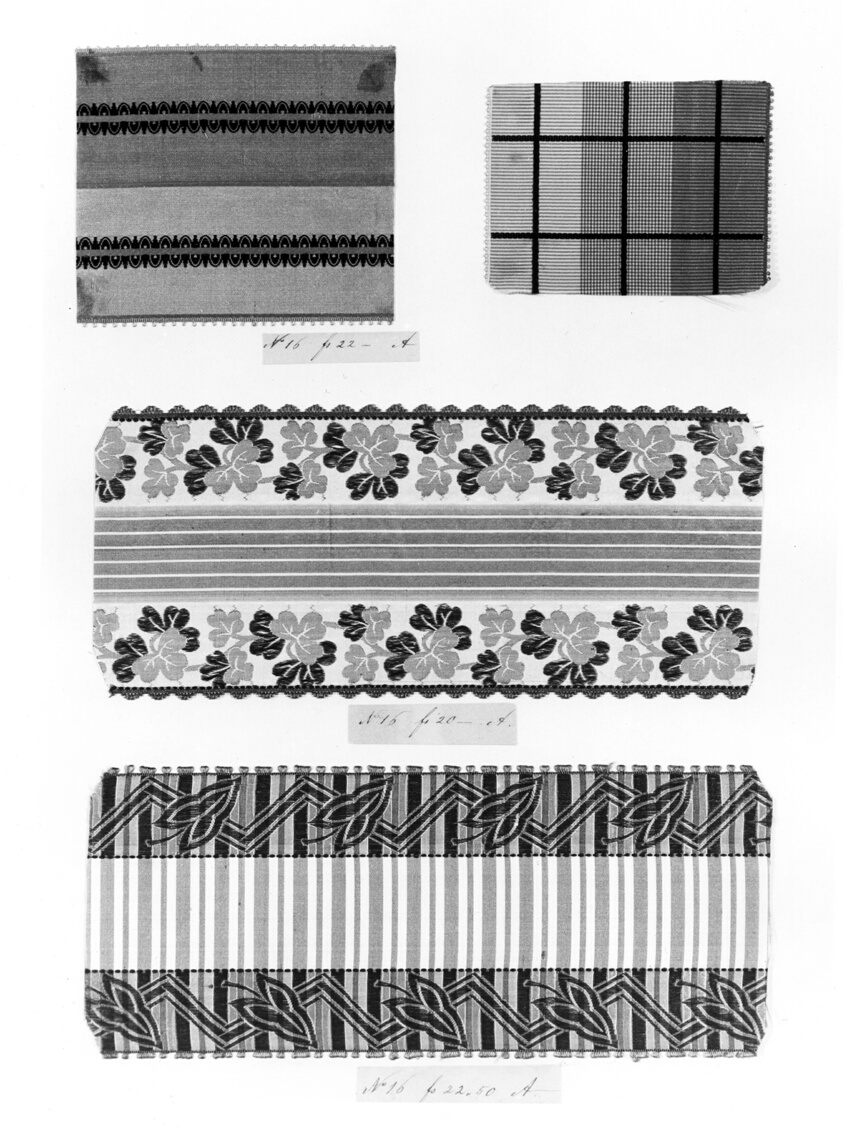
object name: Textile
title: Sample Book of Ribbon Swatches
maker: France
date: 1850/60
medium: Silk, plain, gauze and satin weaves with brocaded patterns, and damask weave; total of swatches: 680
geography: France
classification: textile; sample books